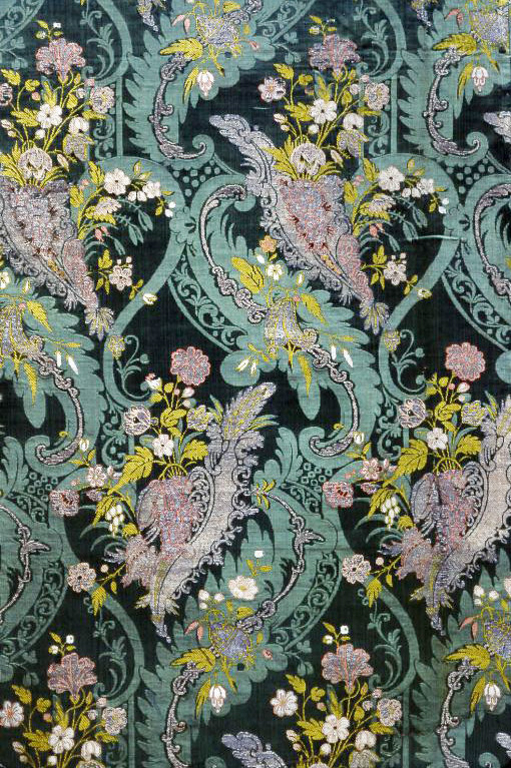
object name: Textile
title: Three Panels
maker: France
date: 1712/13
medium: Silk, gilt-and-silvered-metal-strip-wrapped silk, 4:1 satin weave with supplementary brocading wefts and self-patterned by reversing of faces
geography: France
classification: textile; weaving